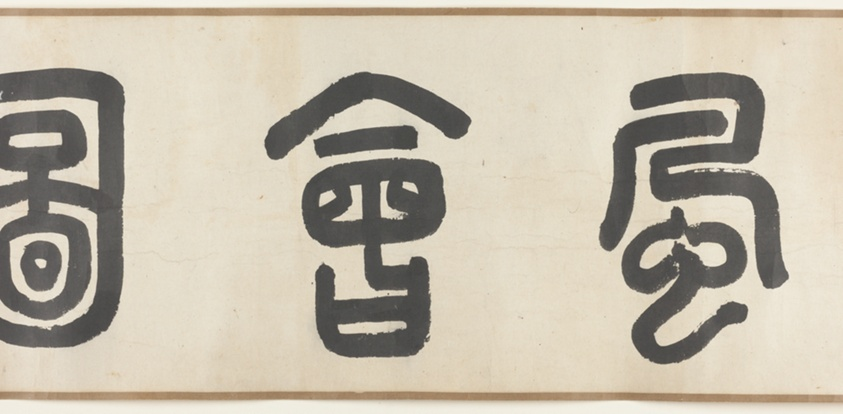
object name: Painting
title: Street Scenes in Times of Peace 太平風會圖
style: Chinese (culture or style)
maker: Zhu Yu (Zhu Junbi) 朱玉（朱君璧）; Chinese, 1293-1365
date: Yuan dynasty (1279–1368), 14th century 元朝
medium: Handscroll; ink and colors on paper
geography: China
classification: handscroll; painting; asian art